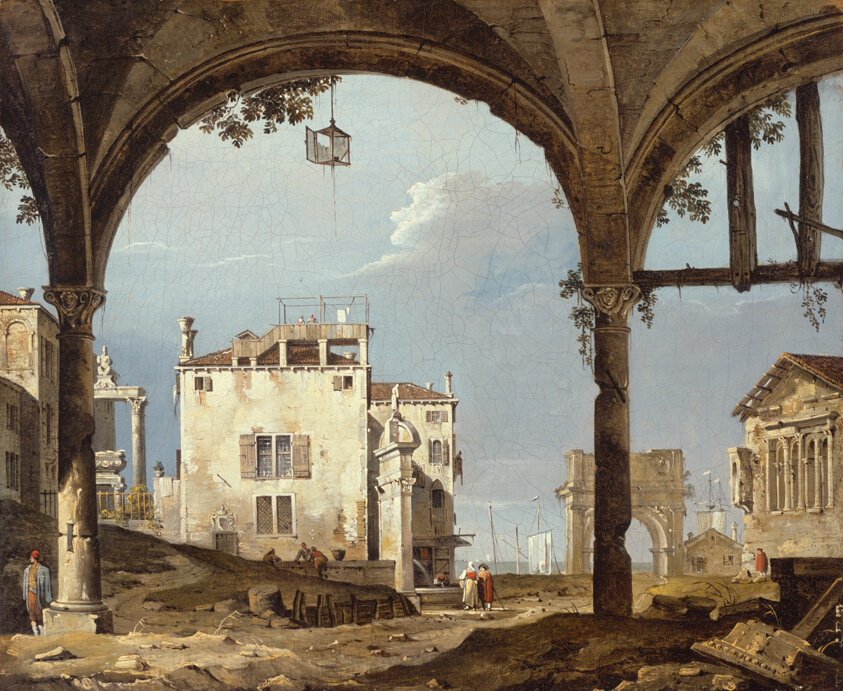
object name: Painting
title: Portico with a Lantern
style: 18th Century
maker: Follower of Canaletto (Antonio Canal; Italian, 1697–1768)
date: 1741/45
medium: Oil on canvas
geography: Italy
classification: oil on canvas; oil paintings (visual works); paint; Italian; painting; european painting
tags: landscape, building, clouds, figures, lantern, man, men, ruins, ships, sky, water, woman, women